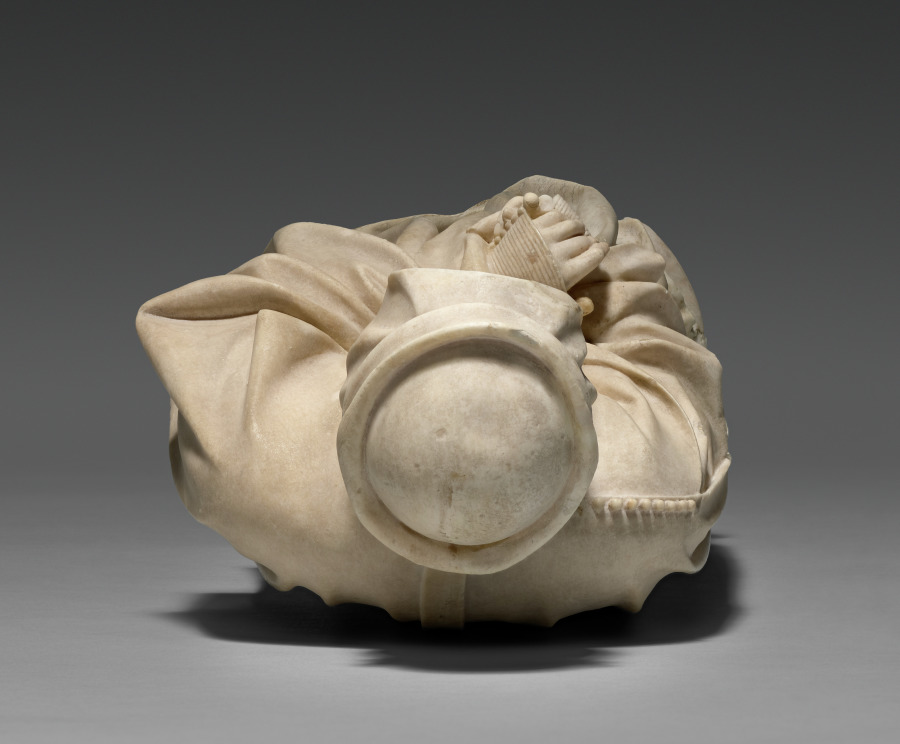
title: Mourner from the Tomb of Philip the Bold, Duke of Burgundy (1364–1404)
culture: Netherlands, active Dijon, 15th century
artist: Claus de Werve (Netherlandish, 1380–1439)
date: 1404–1410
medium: vizille alabaster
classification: Sculpture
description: This figure comes from the tomb of Duke Philip the Bold from the church of Champmol near Dijon (Burgundy, France). Philip, who founded the monastery and designated it as his burial place, hired the best artists, many of whom came from the Netherlands. While the commission was given in 1381, the work was not completed until 1410, six years after the duke’s death. This mourner is unusual for the time because it is not carved as a static low relief on the pedestal of the tomb but interacts with the viewers and their fellow procession members. The lifelike quality of the figure is due in large part to the alabaster. Its softness allowed artists to carve details into the material, and the transparent, milky white stone could also be polished to a high gloss.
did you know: During his life, Duke Philip founded the monastery of Chartreuse de Champmol to serve as a final resting place for himself and his family.